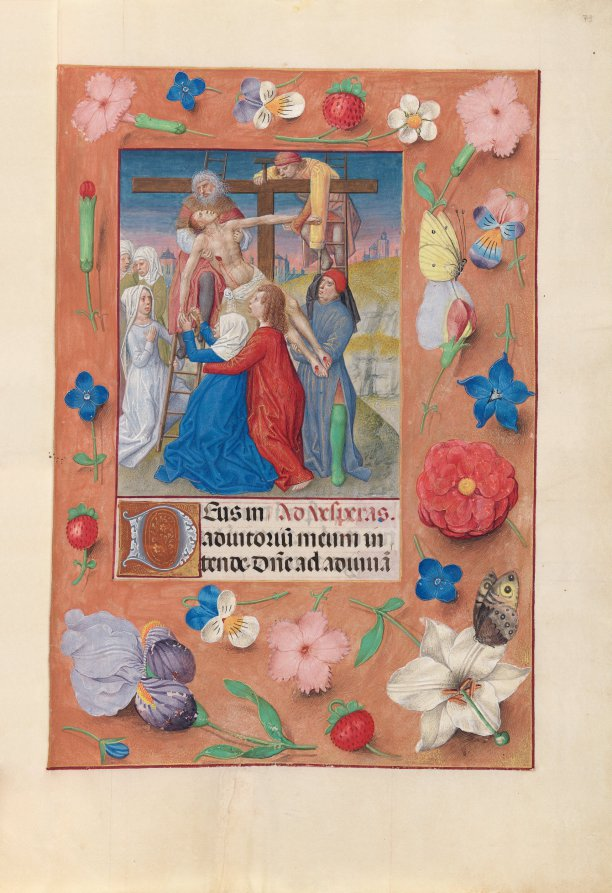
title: Hours of Queen Isabella the Catholic, Queen of Spain: Fol. 73r, Descent from the Cross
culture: Flanders, Ghent and Bruges, late 15th century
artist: Master of the First Prayerbook of Maximillian (Flemish, c. 1444–1519)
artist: and Associates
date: c. 1500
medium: ink, tempera, and gold on vellum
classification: Bound Volume